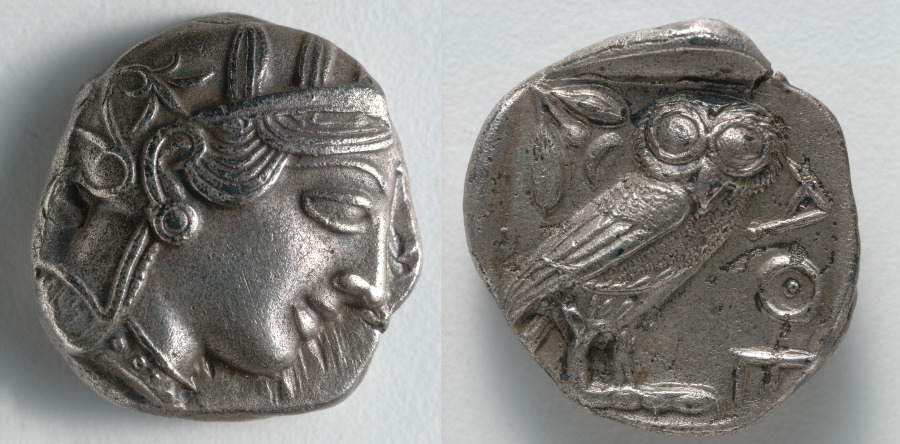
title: Tetradrachm: Head of Athena (obverse); Owl (reverse)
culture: Greek, minted at Athens (Attica)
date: 449–440 BCE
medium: silver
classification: Coins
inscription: ΑΘΕ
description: Incorporating the first three letters of the city name—ΑΘΕ—with then-iconic images of the patron goddess Athena and her owl, the Athenian tetradrachm was among the most widely traded and most recognizable coins of the ancient world. The olive leaves on Athena’s helmet and the small crescent moon behind the owl date this coin after the Persian Wars.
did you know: The images of Athena and her owl unmistakably identify this coin as Athenian.